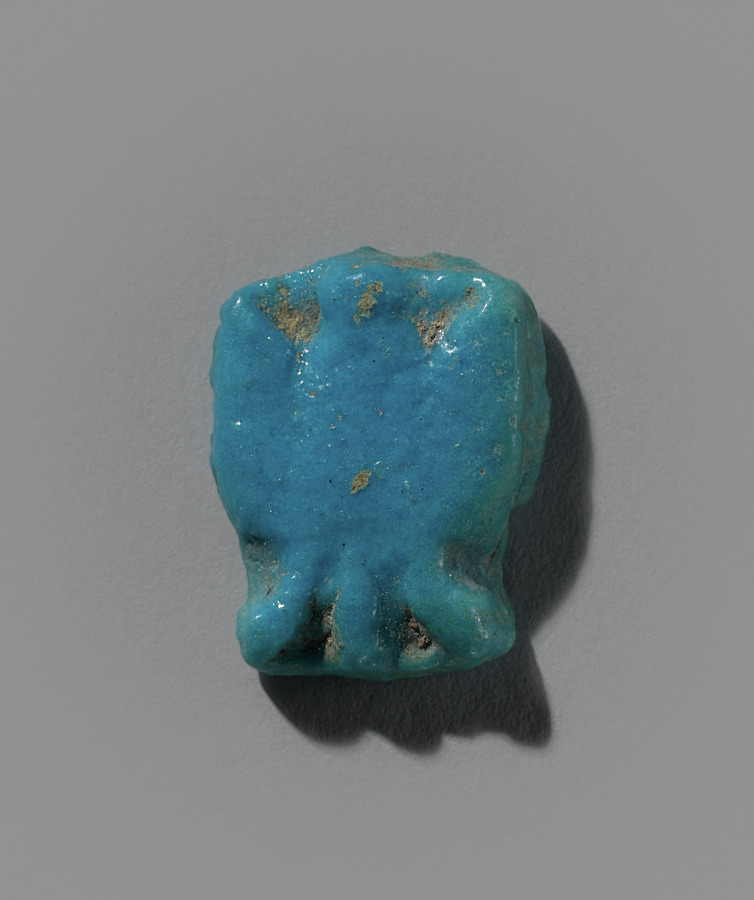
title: Food Model Amulet: Brace of Duck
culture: Egypt, New Kingdom (1540–1069 BCE), Dynasties 19–20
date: 1295–1069 BCE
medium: turquoise faience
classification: Amulets